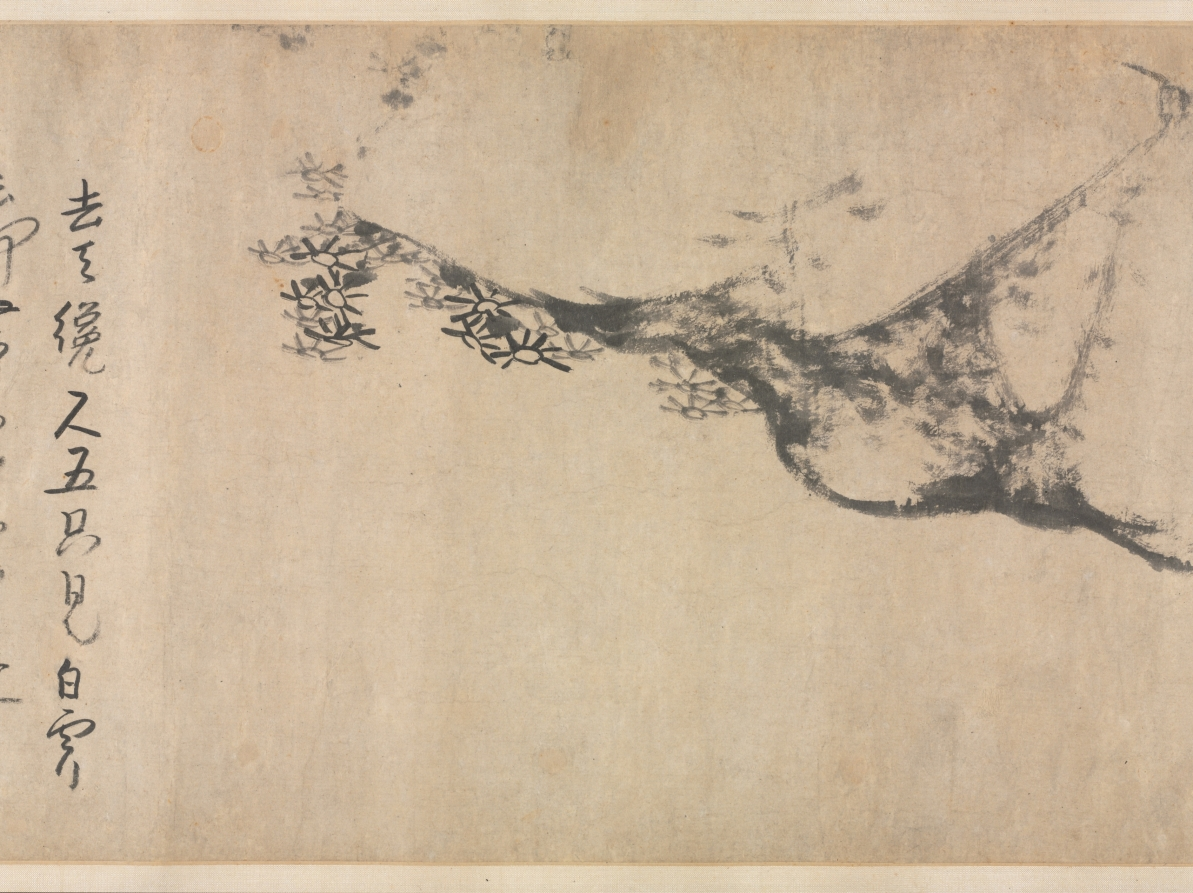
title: Fish and Rocks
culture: China, Qing dynasty (1644-1911)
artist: Bada Shanren (Chinese, 1626–1705)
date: mid- to late 1600s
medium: Handscroll; ink on paper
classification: Painting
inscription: 去天纔尺五，只見白雲行。 云何畫黃花，雲中是金城。 [印] 个山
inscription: 雙井舊中河，明月時延佇。 黃家雙鯉魚，為龍在何處。 [印] 个山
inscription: 三萬六千頃，畢竟有魚行。 到此一黃頰，海潮次上笙。 [印] 个山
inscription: 5 additional seals: 2 of Zhang Daqian 張大千 (1899–1983); 1 of Ta-an Chü-shih; 2 unidentified.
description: Bada Shanren, also called Zhu Da, a 17th-century painter who rejected conventions in favor of an individual, personal expression, is known for his unorthodox compositions of fish, flowers, birds, and rocks. Fish in his paintings are often looking upward toward heaven, swimming in a pond of undefined space. As a member of the Ming imperial family, Zhu Da lost his princely status and hid in a monastery when the Manchus, foreigners from the north, established the Qing dynasty in 1644. This scroll may have some autobiographical meaning, representing fish as leftover subjects (yimin) who lived in a void, having lost their roles in life after the fall of the dynasty.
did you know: After each poem, Bada Shanren used his so-called jixingyin seal 屐形印, which resembles the impression of a shoe on soft mud.